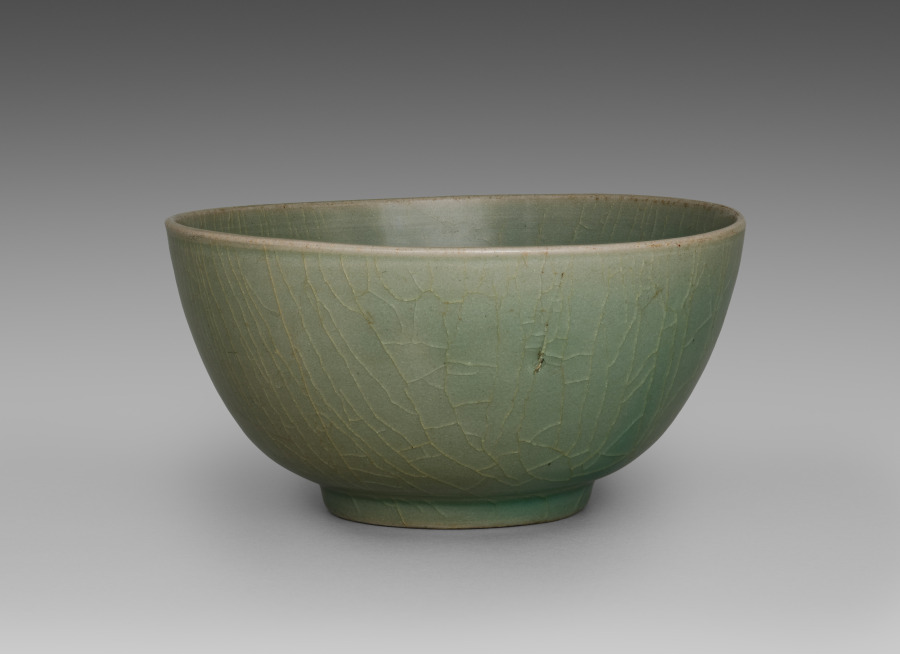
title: Celadon Bowl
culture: Korea, Goryeo dynasty (918–1392)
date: 1200s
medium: Celadon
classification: Ceramic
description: As early as the seventh century, the practice of drinking tea and wine became an important part of elite leisure culture in Korea. A wide bowl like this example was especially suitable for drinking powdered tea shaved from a compressed tea cake, the most commonly enjoyed type during the Goryeo period.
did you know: Crackling occurs when the glaze contracts more rapidly than the clay body during the firing process. In the context of celadon bowls, this phenomenon is not regarded as a flaw but rather as a highly valued aesthetic feature—one that evokes a sense of age.